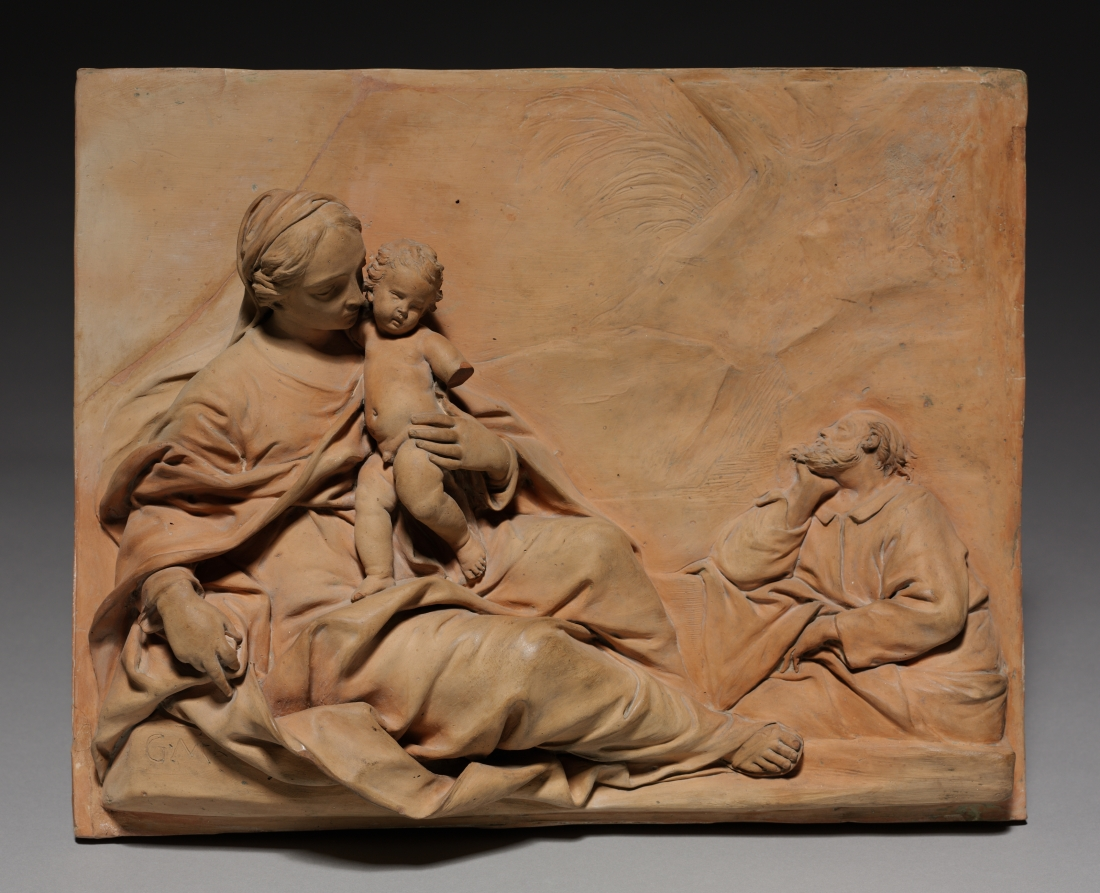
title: Rest on the Flight into Egypt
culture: Italy, Bologna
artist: Giuseppe Mazza (Italian, 1653–1741)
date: c. 1700–1710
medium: terracotta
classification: Sculpture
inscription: inscription in lower left corner: "G.M."